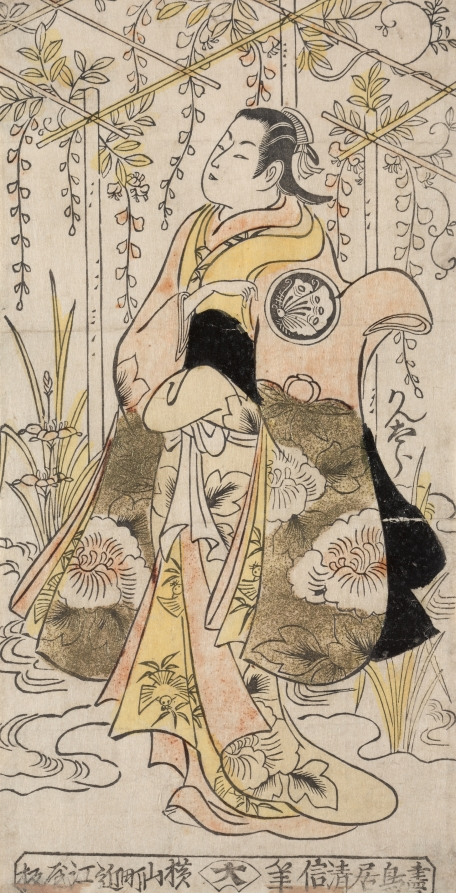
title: Sanjo Kantaro as a Young Woman Standing in a Wisteria Arbor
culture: Japan, Edo period (1615–1868)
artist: Torii Kiyonobu I (Japanese, 1664–1729)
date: c. early or mid 1730s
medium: color woodblock print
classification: Print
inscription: Signature: Gako Torii Kiyonobu hitsu Publisher: Omiya (Yokoyamacho Omiya han, emblem)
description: This rare, hand-colored print incorporates a technique called urushi-e, literally "lacquer picture," in which the artist paints deer glue over areas of black pigment, producing a lustrous effect reminiscent of lacquer. Metal filings were sometimes sprinkled onto the pigment for decorative effect. Kiyonobu’s prints are characteristically hand-colored and outlined in black. Inspired by a family tradition of painters of Kabuki posters, Kiyonobu created prints mainly of actors and scenes from plays.